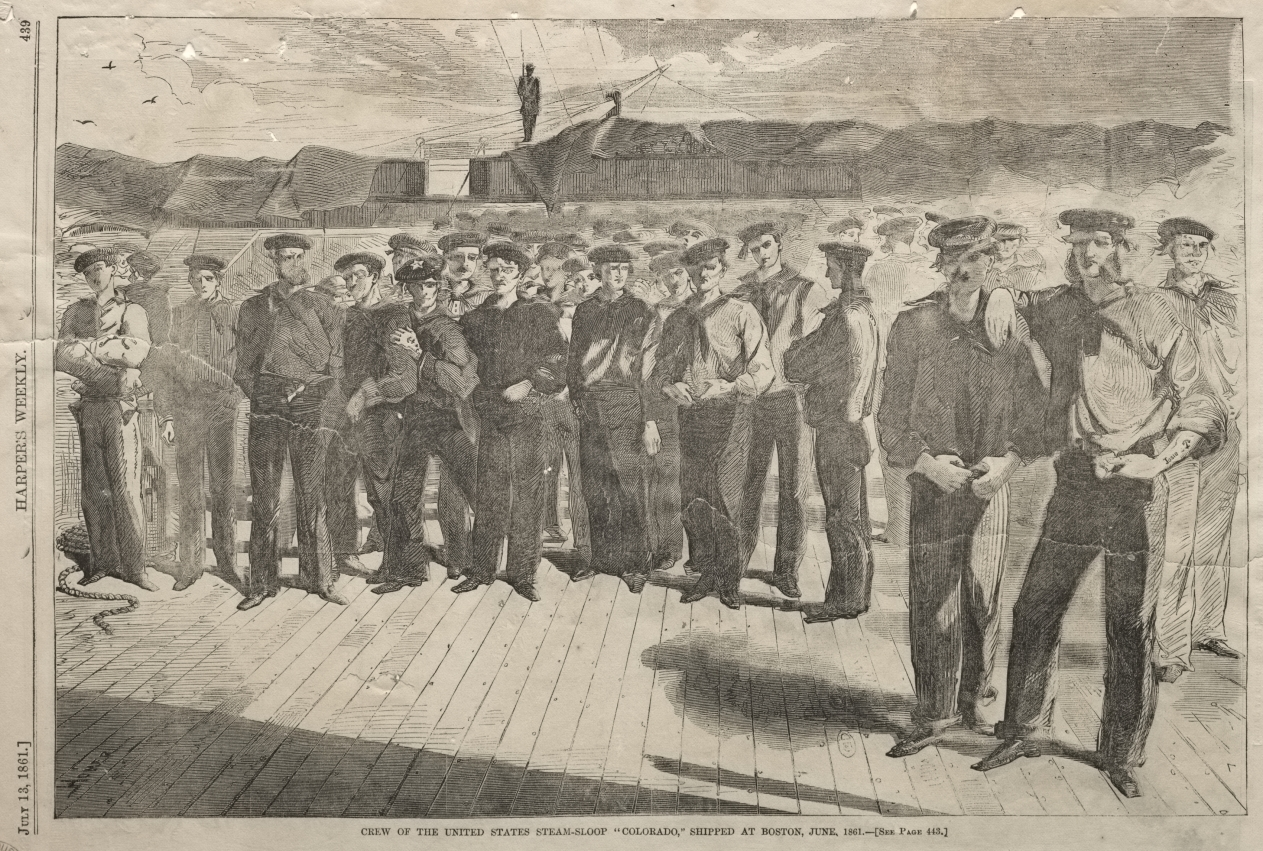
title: Crew of the United States Steam-Sloop "Colorado," Shipped at Boston, June 1861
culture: America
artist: Winslow Homer (American, 1836–1910)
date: 1861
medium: wood engraving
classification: Print